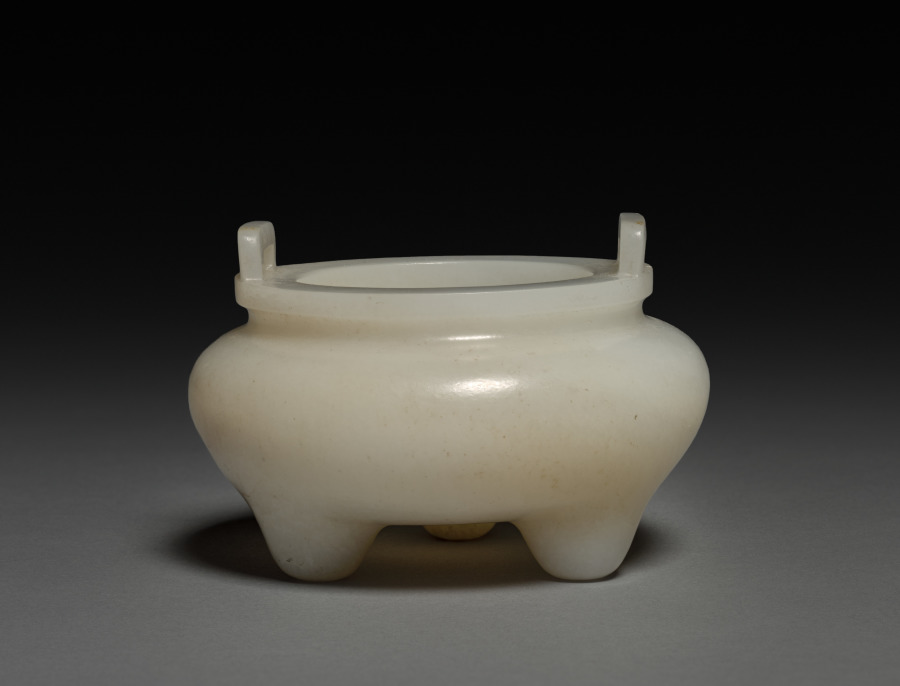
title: Tripod Incense Burner, Ding Shape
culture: China, Qing dynasty (1644-1911)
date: 1644–1911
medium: jade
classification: Jade